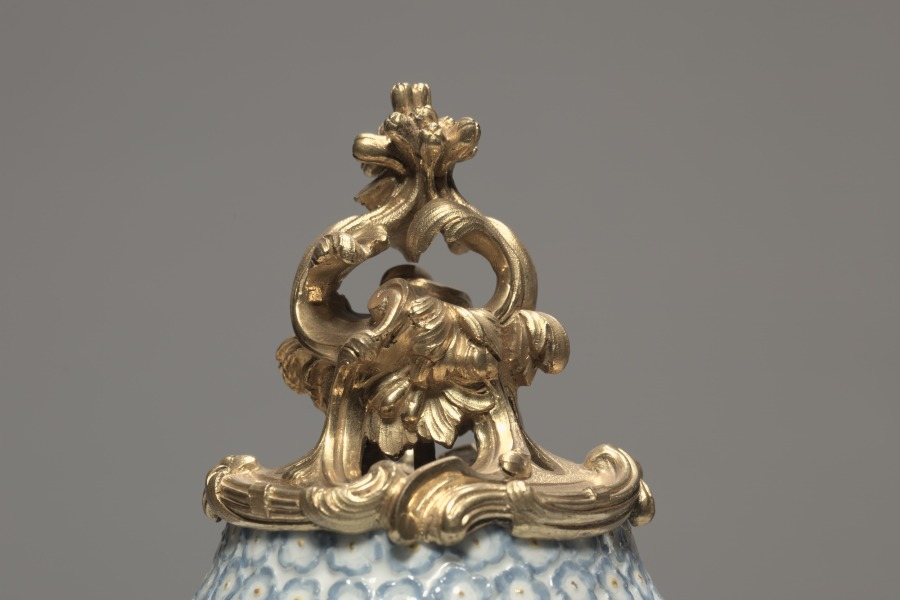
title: Cover for a Vase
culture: Germany, Meissen, 18th century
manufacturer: Meissen Porcelain Factory (German, est. c. 1710)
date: 1749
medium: porcelain mounted in gilt bronze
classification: Ceramic